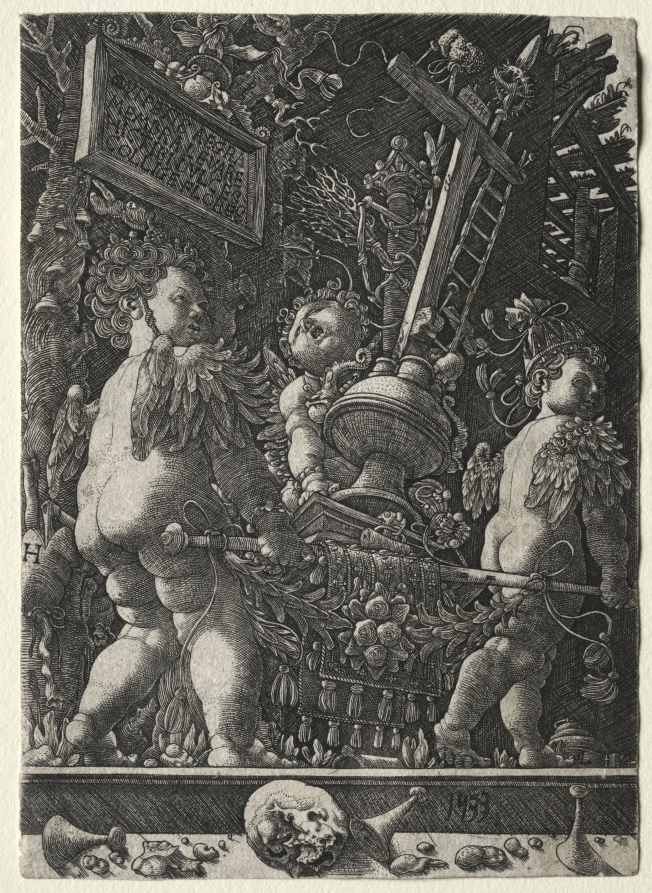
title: Angels Carrying the Emblems of the Passion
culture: Germany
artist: Master H. L. (German)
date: 1533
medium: engraving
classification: Print